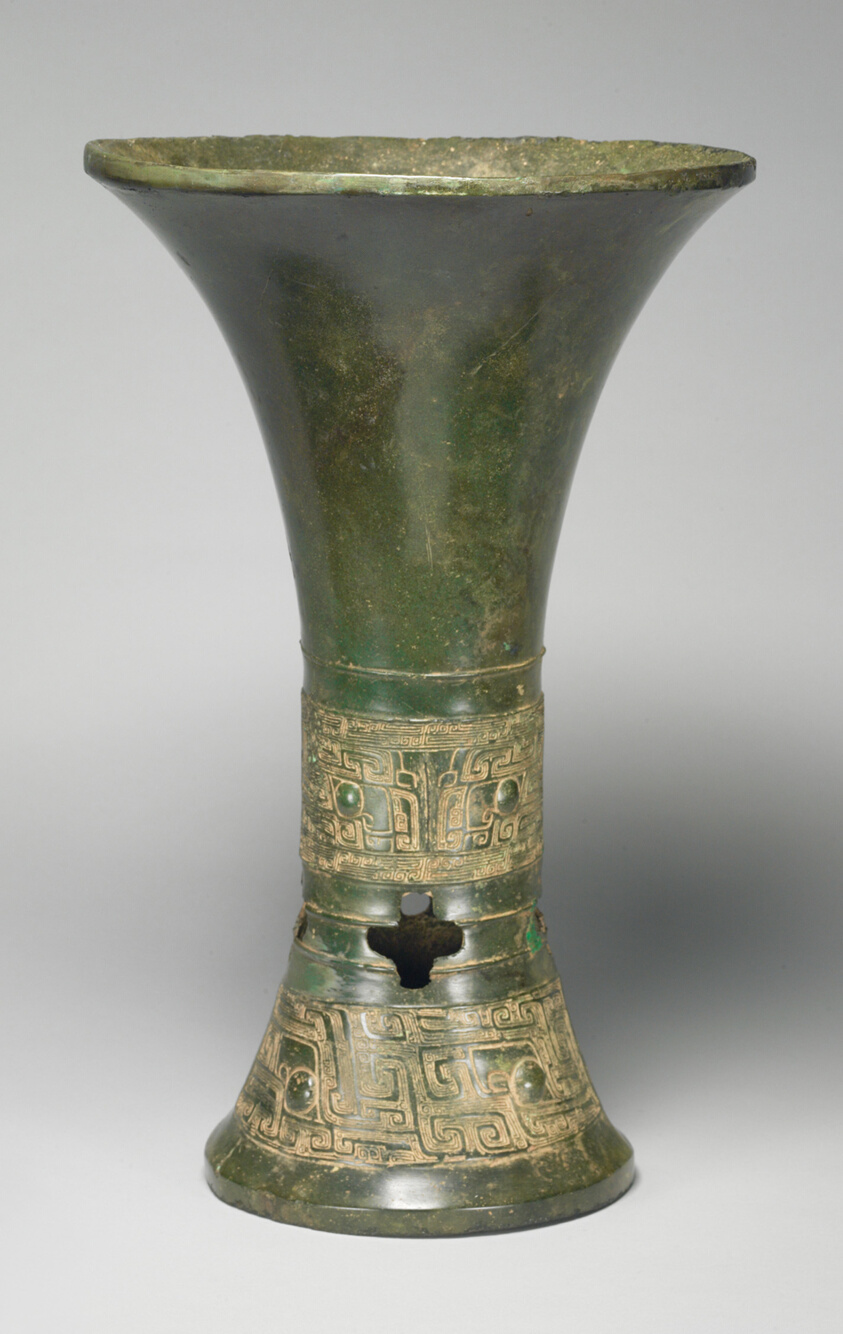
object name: Decorative Arts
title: Beaker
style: Chinese (culture or style)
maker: China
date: Shang dynasty ( about 1600–1046 BC )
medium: Bronze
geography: China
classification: vessel; vessel for serving drinks; decorative arts